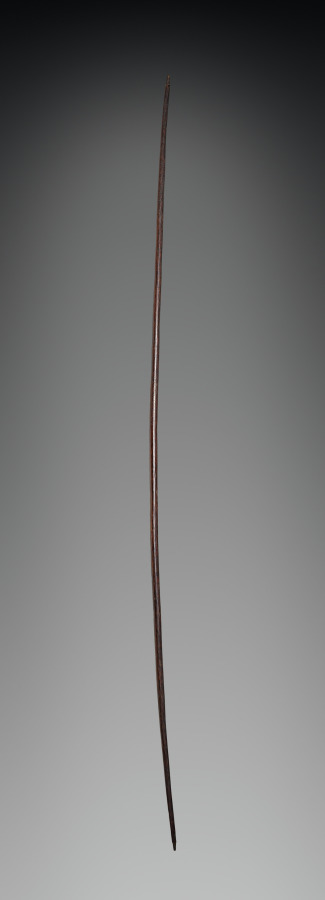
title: Bow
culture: Philippines, probably Luzon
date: before 1922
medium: wood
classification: Arms and Armor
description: This long, slender bow is carved from a single piece of dark hardwood. It has a smooth, undecorated surface and a gentle natural curvature. Shallow grooves are cut into each end to secure a bowstring.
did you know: The bow’s simple, functional design is characteristic of the Aeta (or Agta) people of the island of Luzon in the northern Philippines.